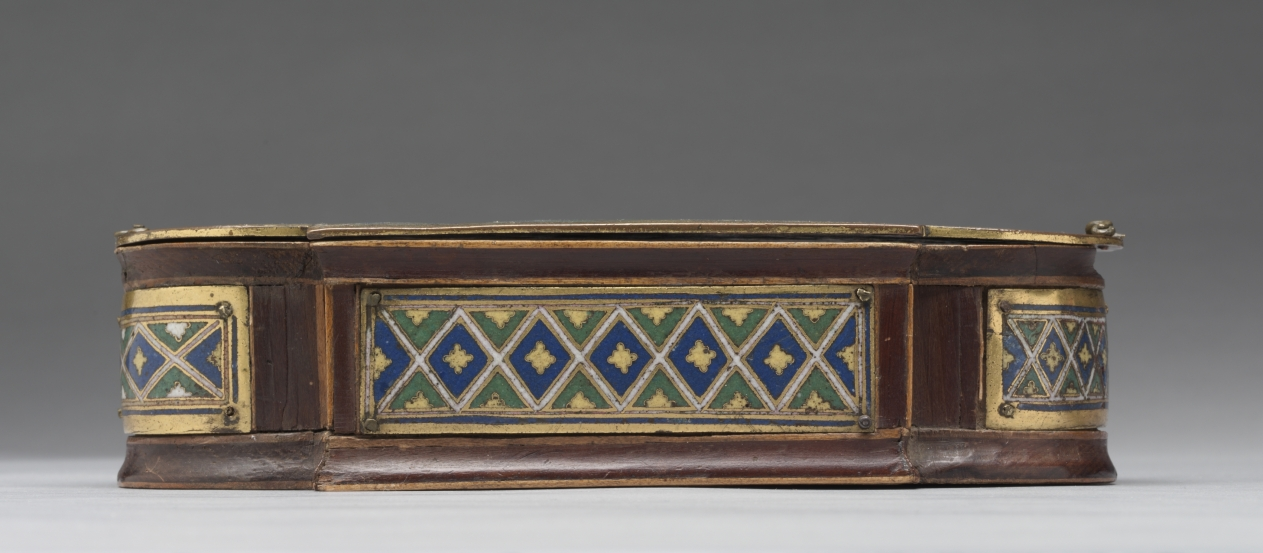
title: Pyx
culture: Germany, Lower Saxony, Hildesheim?, Romanesque period, enamels: 12th century; wood core: 19th century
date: c. 1170–1180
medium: gilded copper, champlevé and cloisonné enamel, wood core (modern)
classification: Enamel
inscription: + H[A]EC DATA P[ER] IVSTV[M] […]AT IN CRVCE VICTIMA CHR[ISTV]M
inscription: + HOC ARIES P(RE)FERT Q[VO]D […] D[EV]S HOSTIA P[ER]FERT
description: The image of Christ’s crucifixion dominates this enameled box. Personifications of the Christian church, the Jewish faith, and the Virgin and Saint John flank the cross. Two Old Testament scenes--Abel’s sacrifice of sheep and Abraham’s sacrifice of Isaac--appear on either side. The box once served as a pyx, a container for the consecrated host, itself a symbol of Christ’s sacrifice.